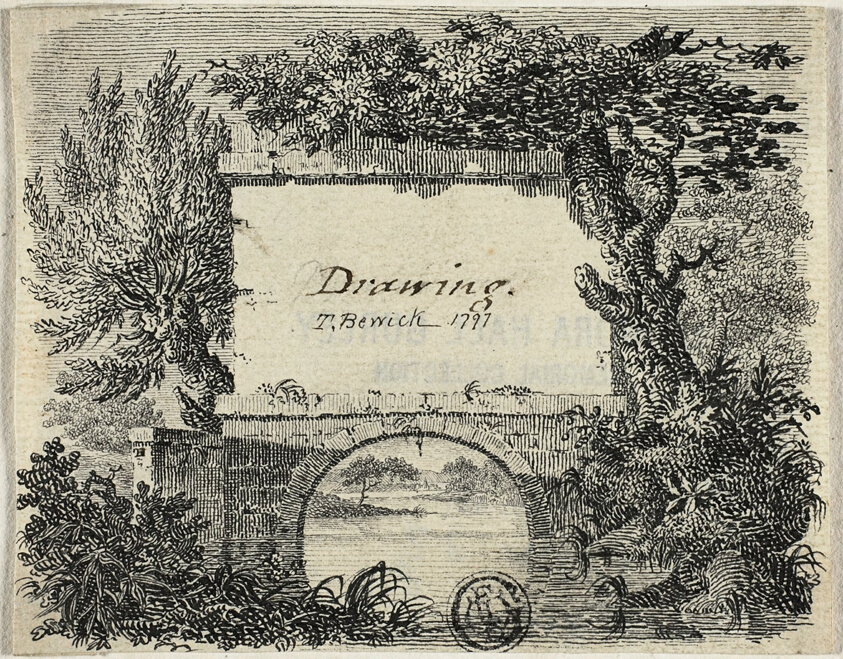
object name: Drawing and Watercolor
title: Vignette with Bridge Trees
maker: Attributed to Thomas Bewick; English, 1753-1828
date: 1797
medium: Pen and black ink on ivory laid paper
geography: England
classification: pen and ink drawings; drawings (visual works); prints and drawing